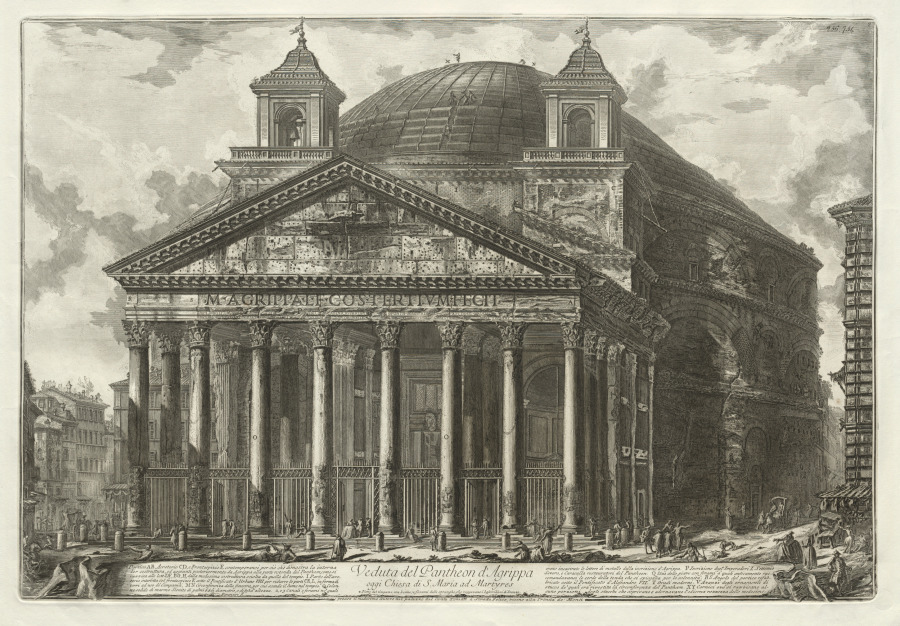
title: Views of Rome: The Pantheon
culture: Italy, 18th century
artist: Giovanni Battista Piranesi (Italian, 1720–1778)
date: 1761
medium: etching and engraving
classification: Print